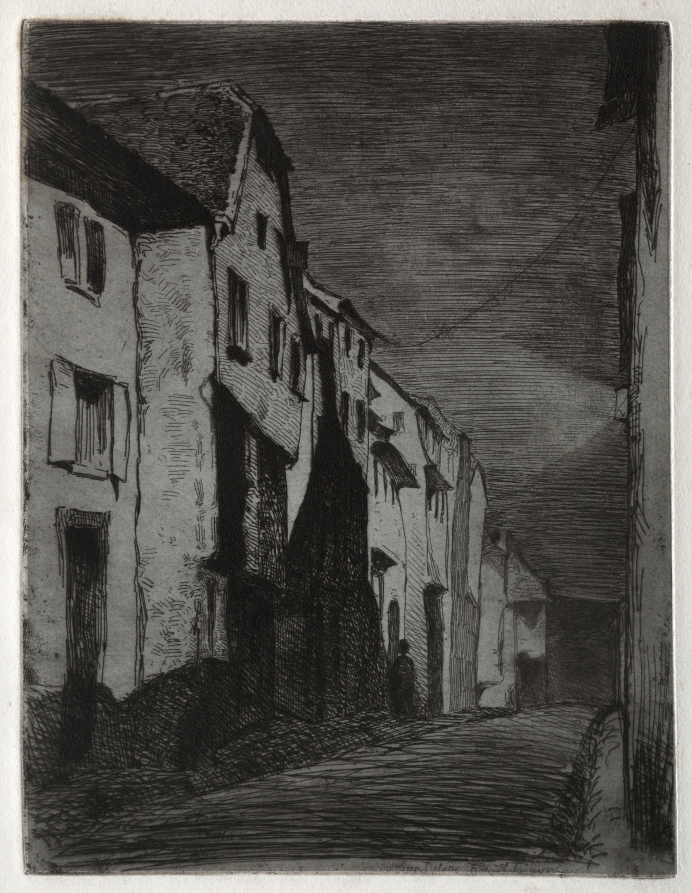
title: Street at Saverne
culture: America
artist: James McNeill Whistler (American, 1834–1903)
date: 1858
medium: etching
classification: Print